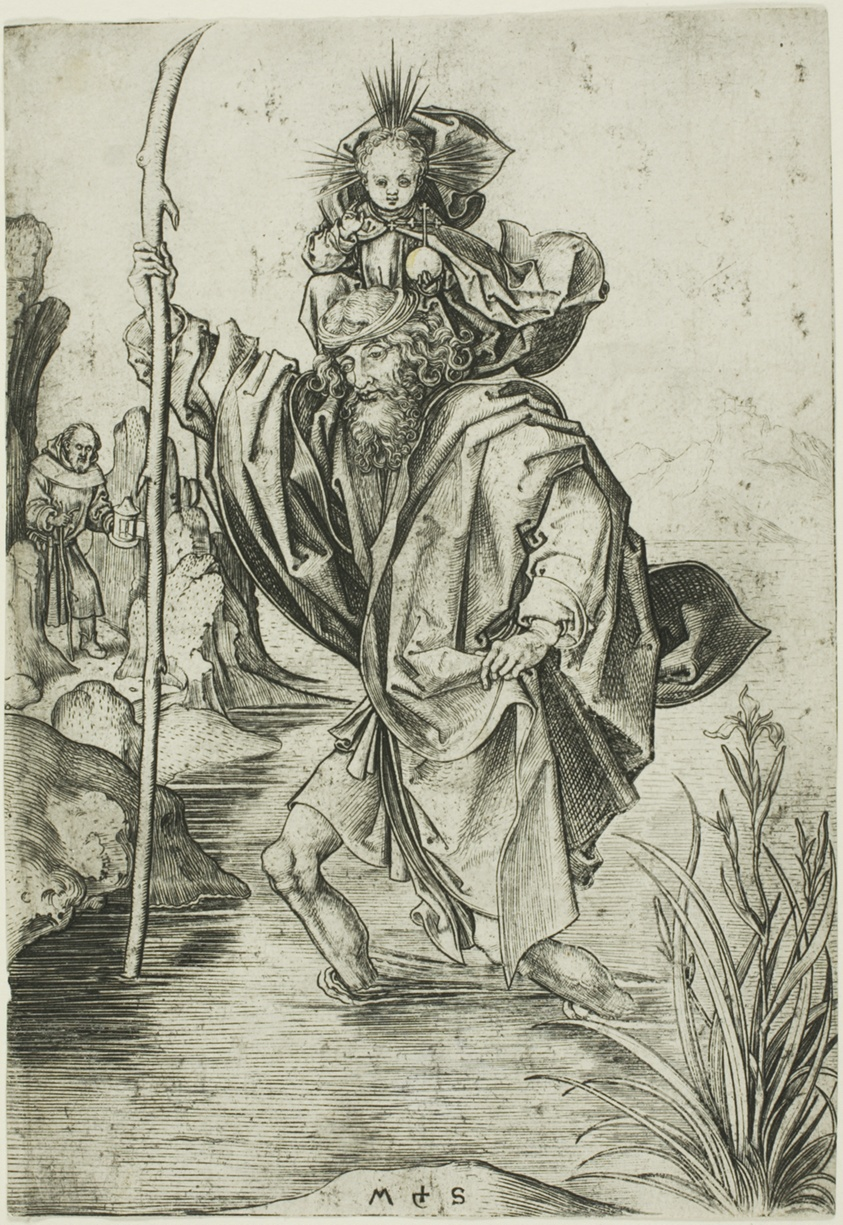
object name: Print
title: St. Christopher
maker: Martin Schongauer (German, c. 1430/50-1491)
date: c. 1475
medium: Engraving on paper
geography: Germany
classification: engraving; print; prints and drawing